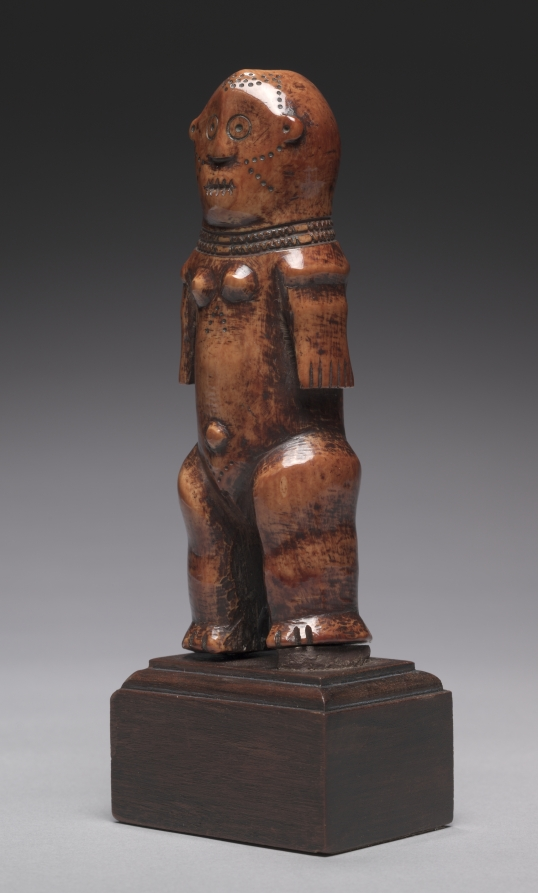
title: Figure (iginga)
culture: Africa, Central Africa, Democratic Republic of Congo, Lega-style maker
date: probably 1800s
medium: Elephant ivory, tukula, and oil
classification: Sculpture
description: The life of Lega men and women is structured around their advancement through the different grades of the Bwami association. Fulfilling political, social, religious, and other roles, the members’ ultimate purpose is the pursuit of wisdom and excellence. Ivory figurines were reserved for members of the two highest Bwami grades, in which the core of the Lega’s moral philosophy is revealed.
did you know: The dark surface (patina) of this sculpture comes from years of handling and the application of oil and a red powder called tukula; it was originally cream-colored!